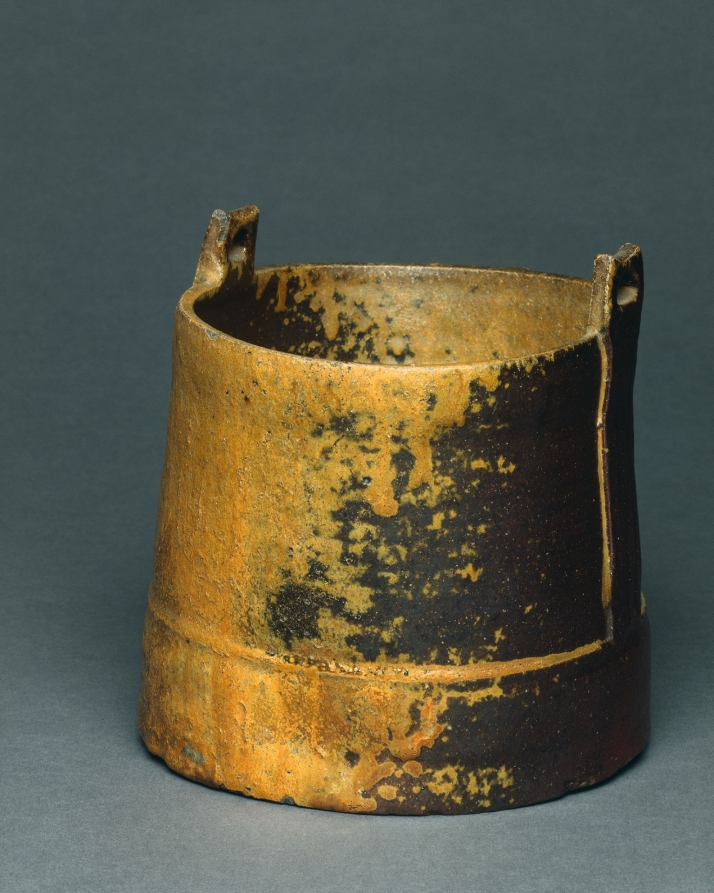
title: Water Container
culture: Japan, Momoyama period (1573–1615)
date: early 1600s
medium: glazed stoneware (Bizen ware, Imbe type)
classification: Ceramic